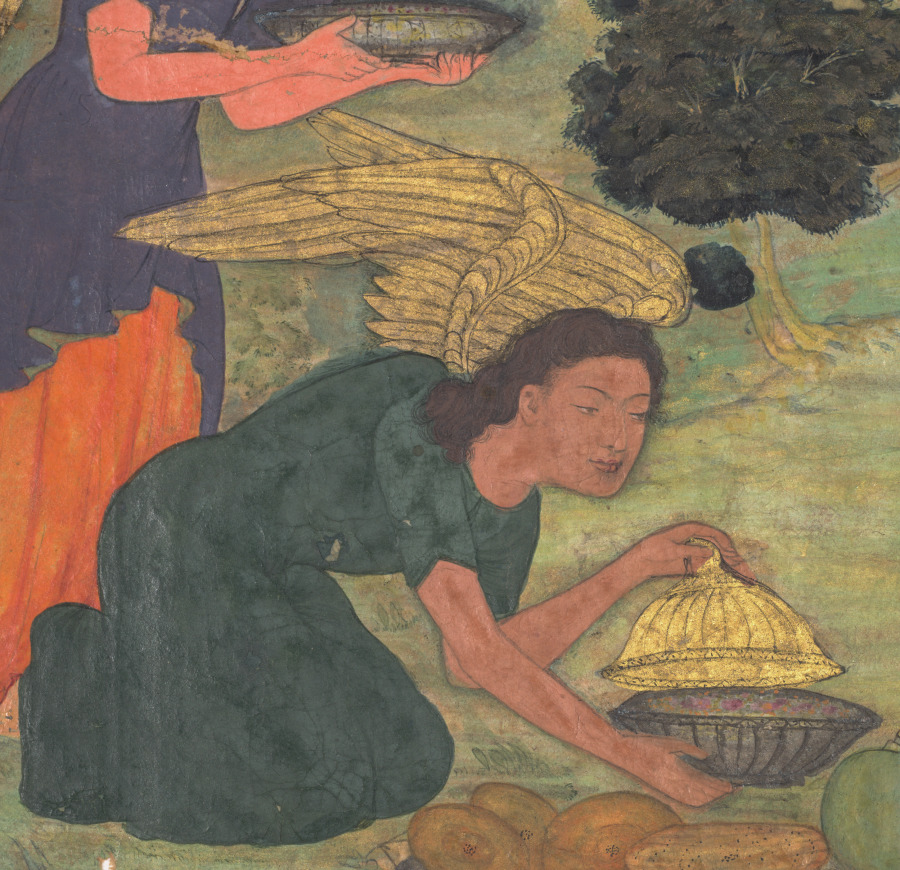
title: Angels bring food to Jesus in the wilderness (folio 55 recto), from a Mirror of Holiness (Mir’at al-quds) of Father Jerome Xavier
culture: Mughal India, Allahabad, made for Prince Salim (1569–1627)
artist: Muhammad Sharif (Indian, active c. 1600)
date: 1602–4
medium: Gum tempera, ink, color, and gold on paper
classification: Manuscript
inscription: Signature of the artist, Muhammad Sharif (Indian, active c. 1600), is written in the tiny pot by Jesus's foot.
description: To end his 40-day fast, five angels brought Jesus refreshments from heaven: breads, melons each with a knife for convenient cutting, fresh leeks, and what appear to be fragrant rice dishes and curries, along with cups of wine. Four of the angels are dressed in robes, and one is clothed only in feathers. After his baptism, Jesus spent 40 days and nights in the desert where he fasted, practiced spiritual exercises, and successfully resisted the temptations of Satan. Many of the rocks in this painting have faces, called grotesques. This page is the only surviving folio from this manuscript that has an artist’s signature, written in the tiny pot by Jesus’s foot.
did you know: The artist has put faces in the rocks, following a Persian convention.